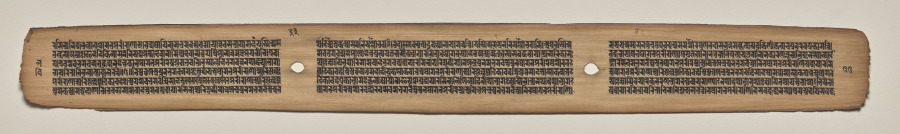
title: Text, Folio 33 (verso), from a Manuscript of the Perfection of Wisdom in Eight Thousand Lines (Ashtasahasrika Prajnaparamita-sutra)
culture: Eastern India, Bihar, Vikramashila Monastery. Painting: Nepal, Kathmandu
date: Sunday, September 14, 1119 (year 239 of the Newar Samvat in the month of Ashvina)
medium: gum tempera and ink on palm leaves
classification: Painting